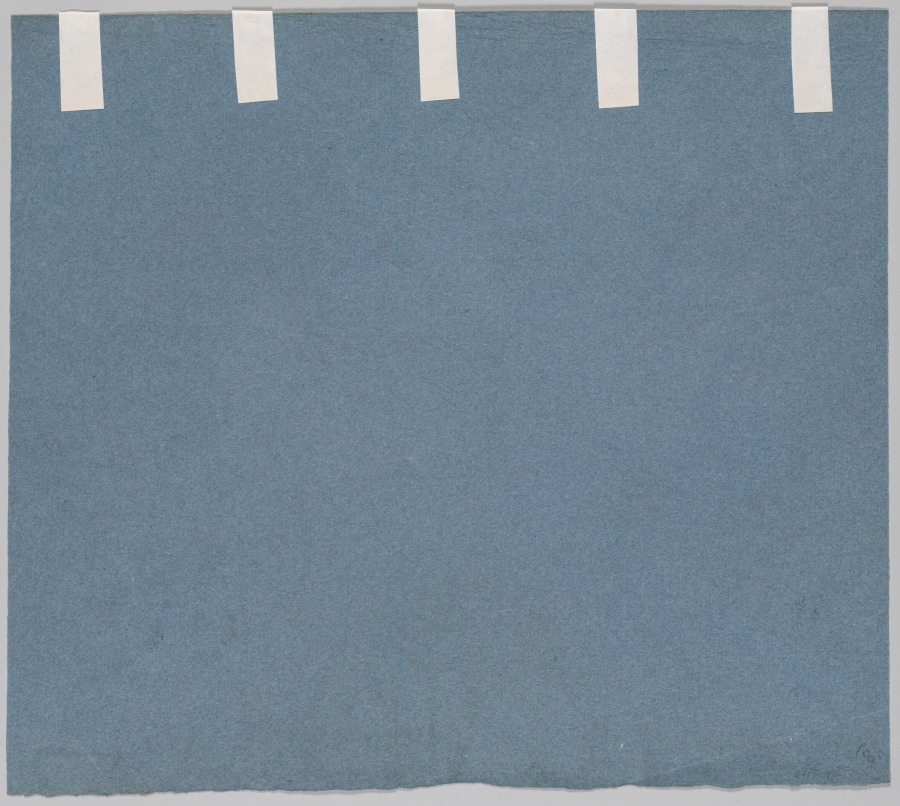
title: The Temptation of St. Anthony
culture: France, 19th century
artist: Julien Léopold Boilly (French, 1796–1874)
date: 19th century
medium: Black chalk with white, pink, orange, ochre, and brown chalks on blue paper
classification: Drawing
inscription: verso: lower right corner, in graphite: 8 (inscribed in circle)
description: Boilly’s scene represents the Temptations of Saint Anthony, a biblical subject. While embarking on his desert pilgrimage through Egypt, Anthony experienced a series of supernatural trials. Here, Boilly illustrated a nude nymph attempting to seduce him. Anthony’s horrified reaction to the woman’s embrace and the prominent crucifix on the right create a humorous juxtaposition between piety and lustful desire.